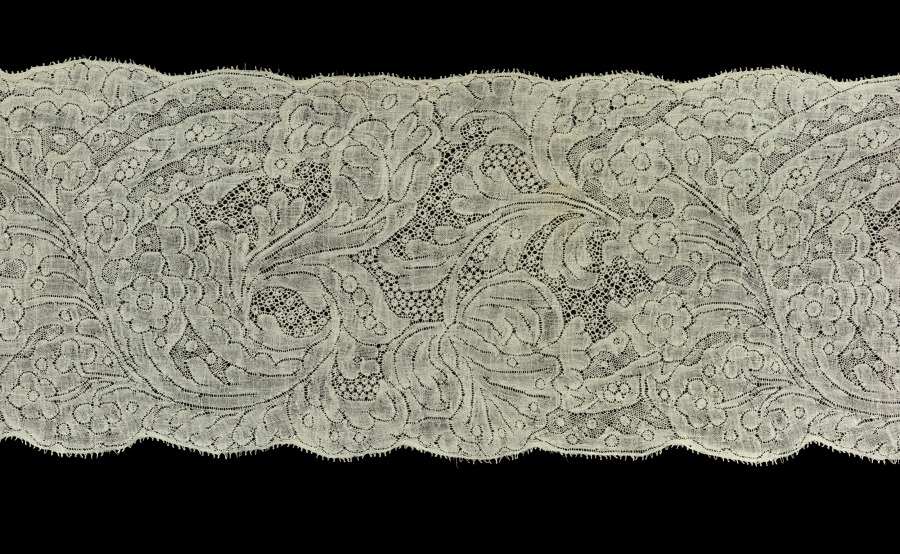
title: Lace Lappet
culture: Belgium, Binche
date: 1700s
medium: Linen: bobbin lace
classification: Lace